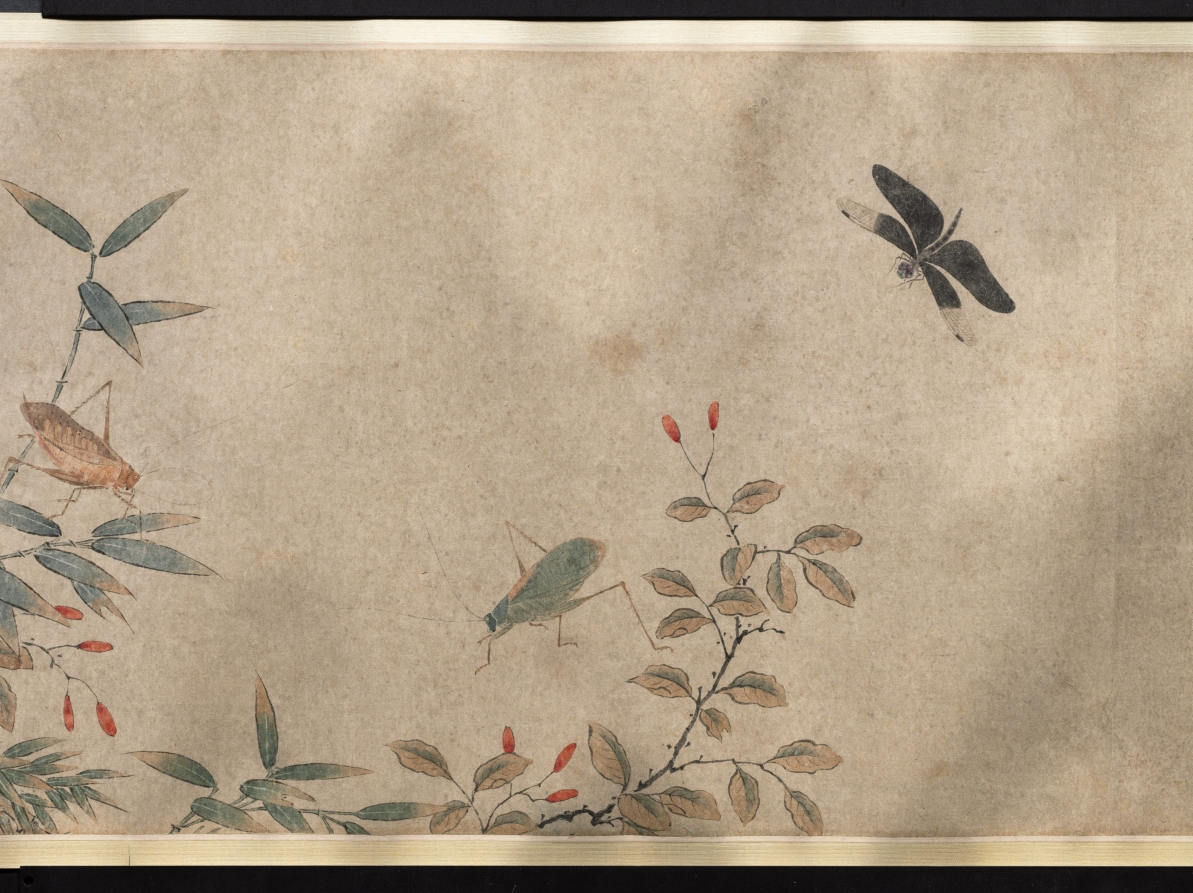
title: Insects and Flowers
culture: China, Qing dynasty (1644-1911) or Republican period (1912-49)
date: c. 1900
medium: Handscroll, ink and color on paper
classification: Painting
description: More than 26 feet long, this scroll presents insects, reptiles, and plants in delicate brushwork and pale colors, referring in style to earlier Southern Song dynasty (1127–1279) bird-and-flower paintings. Upon closer inspection, ants dismember a butterfly and reptiles wait to ambush their prey. An inscription at the end of the painting gives us an idea of its meaning: Attributed to the Qing dynasty scholar Zhang Xigeng (張錫庚, 1801–1861), the inscriber relates the work to an earlier painting by Qian Xuan (錢選, c. 1235–before 1307) and further suggests that the painting may allude to the relentlessness of natural selection. By drawing a parallel to tumultuous episodes in Chinese history, the writer might even hint at the domestic rebellions and the aggression of Western powers against China in his lifetime, particularly the Opium Wars (1839–60).